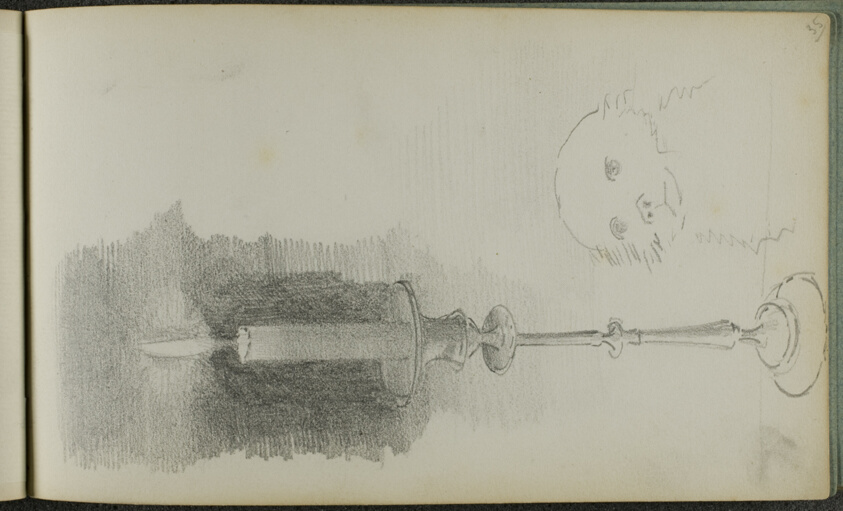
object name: Book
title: Sketchbook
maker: Odilon Redon (French, 1840-1916)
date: c. 1879–85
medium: 55-page sketch book of drawings in pencil on cream wove (with a few buff and blue) paper, with (simulated) laid paper interleaves, bound in black cardboard with black fabric taping on spine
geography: France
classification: sketchbook; graphite; prints and drawing; book; paper